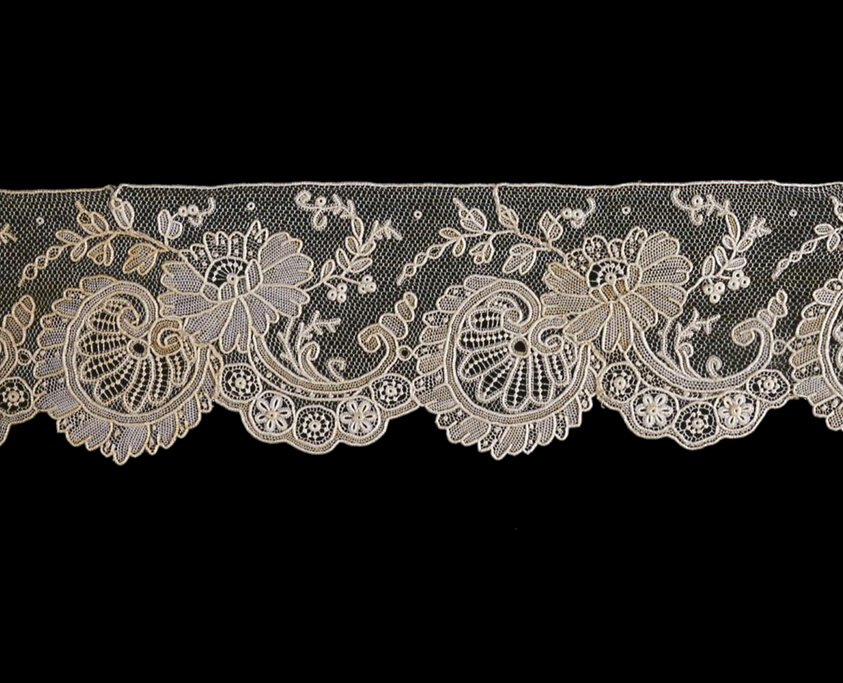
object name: Textile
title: Border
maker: Belgium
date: 1860/80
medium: Cotton, needle lace of a type known as "Point de Gaze"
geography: Belgium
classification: textile; lace - needle; lace